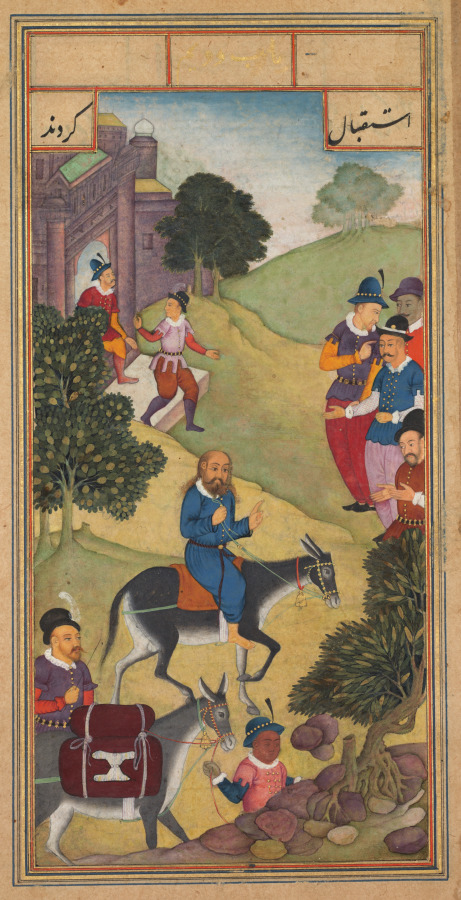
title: The Entry into Jerusalem (folio 156 recto), from a Mirror of Holiness (Mir’at al-quds) of Father Jerome Xavier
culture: Mughal India, Allahabad, made for Prince Salim (1569–1627)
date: 1602–4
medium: Gum tempera, ink, color, and gold on paper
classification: Manuscript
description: Jesus rides astride a female donkey, as specified in the text, and he greets a group of four men, two of whom seem to welcome him with hands extended. He follows the road to the gates of Jerusalem, which appear in the upper left corner. Father Jerome devoted only three short lines to this episode, so perhaps its selection for illustration is connected to an old and popular Islamic saying: “If Jesus’s donkey is taken to Mecca, when it comes back it will still be a donkey.”